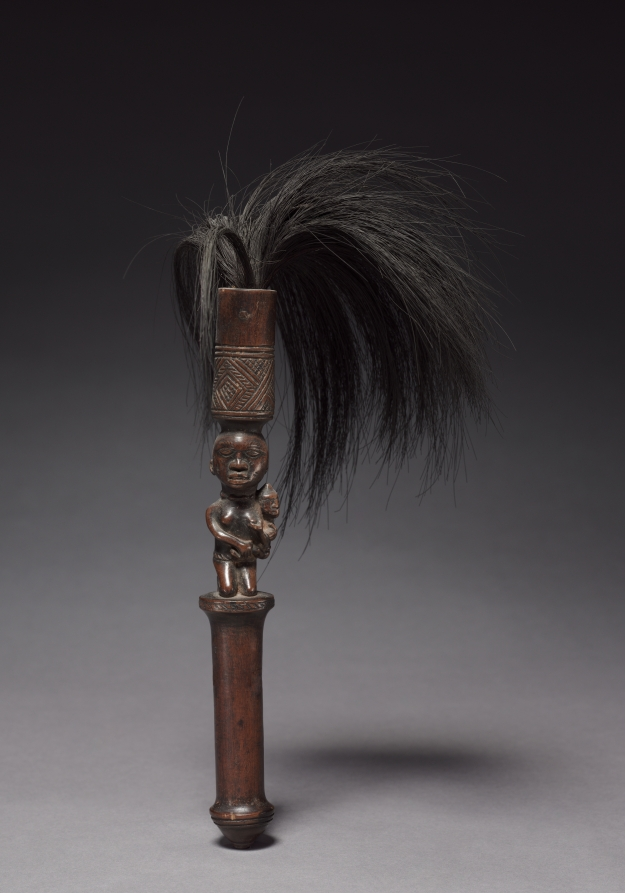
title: Flywhisk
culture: Africa, Central Africa, Democratic Republic of Congo (most likely), Cabinda, or Republic of the Congo, probably Yombe-style maker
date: late 1800s-early 1900s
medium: Wood and animal hair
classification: Sculpture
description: In Central Africa, flywhisks denoted status, rank, and function, rather than used to whisk away flies. Commonly associated with chiefs and titleholders, they were also owned by diviners and healers. Their purpose may also have been used to purify spaces, bless people, places, or things, and settle disputes. Flywhisks rarely depict women; yet this finely carved miniature of a woman kneeling signifies obedience and respect.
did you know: Rarely do flywhisks depict a female figure.